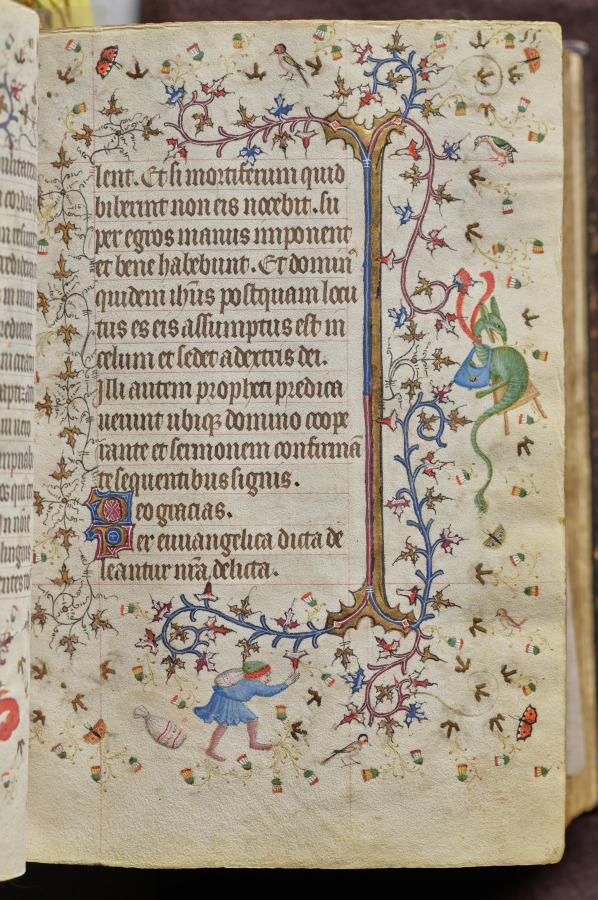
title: Hours of Charles the Noble, King of Navarre (1361-1425): fol. 28r, Text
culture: France, Paris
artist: Master of the Brussels Initials and Associates (French)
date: c. 1405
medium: ink, tempera, and gold on vellum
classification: Bound Volume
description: This precious volume was obviously highly prized by its owner, the French-born King of Navarre, who had his coat of arms painted on no less than twenty folios. Rather than directly commissioning this manuscript from a specific workshop, it seems that Charles the Noble acquired his book of hours -- perhaps ready-made for the luxury market -- while on a trip to Paris in 1404-05. A collaborative effort, six painting styles are evidenced within the pages of this codex, those of two Italians, two Frenchmen, and two Netherlanders. The painter who was responsible for the planning and decoration of the book, and who produced seventeen of the large miniatures, was a Bolognese artist known as the Master of the Brussels Initials. His principal assistant, responsible for most of the borders, was a Florentine who signed his name "Zecho" da Firenze on folio 208 verso.